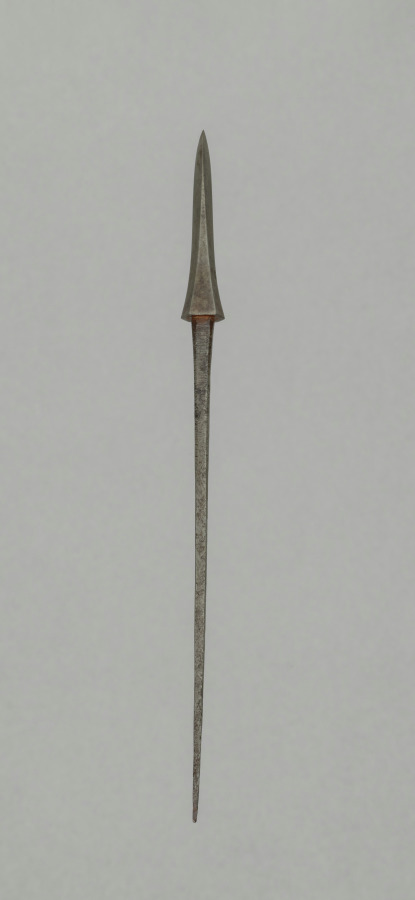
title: Arrow Point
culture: Japan, Edo period (1615–1868)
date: 1700s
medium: steel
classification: Arms and Armor